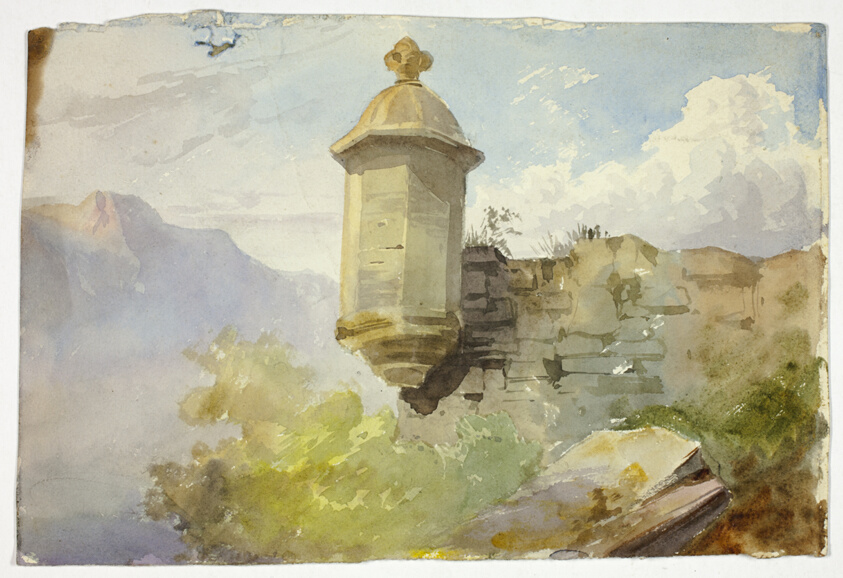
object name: Drawing and Watercolor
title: Domed Lookout on Wall in Mountain Landscape (recto); Figures Crossing Bridge before Mountain (verso)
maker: Unknown Artist; British, 19th century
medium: Watercolor over traces of black chalk (recto and verso), on ivory wove paper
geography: United Kingdom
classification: watercolor; drawings (visual works); prints and drawing